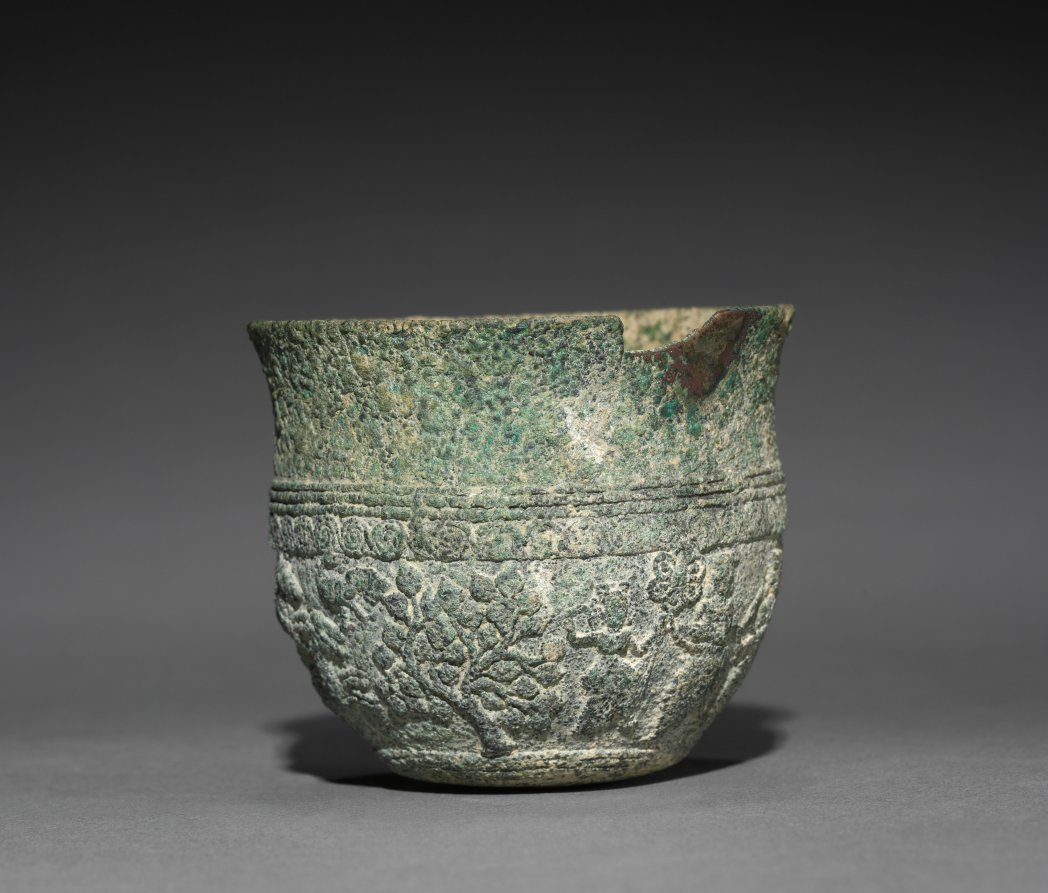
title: Libation Cup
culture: India, Maurya period (322–185 BCE)–Shunga period (185–78 BCE)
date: c. 235–185 BCE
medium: bronze, lost wax technique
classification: Metalwork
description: The remarkably clear, tiny carvings in an uninterrupted frieze around the lower section include one sacred palm tree and one fig tree (ficus religiosa) that divide the space into two main scenes. One features female musicians, the other has two chariots, each drawn by a pair of galloping horses. Bulls, birds, and flowers fill the background spaces. This cup is from a group found in an area with close links to Indo-Greek kingdoms, and the chariots and framing motifs reveal knowledge of Hellenistic art.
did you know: The tree carved into the cup is of the same species as the Bodhi tree, under which the Buddha reached enlightenment.